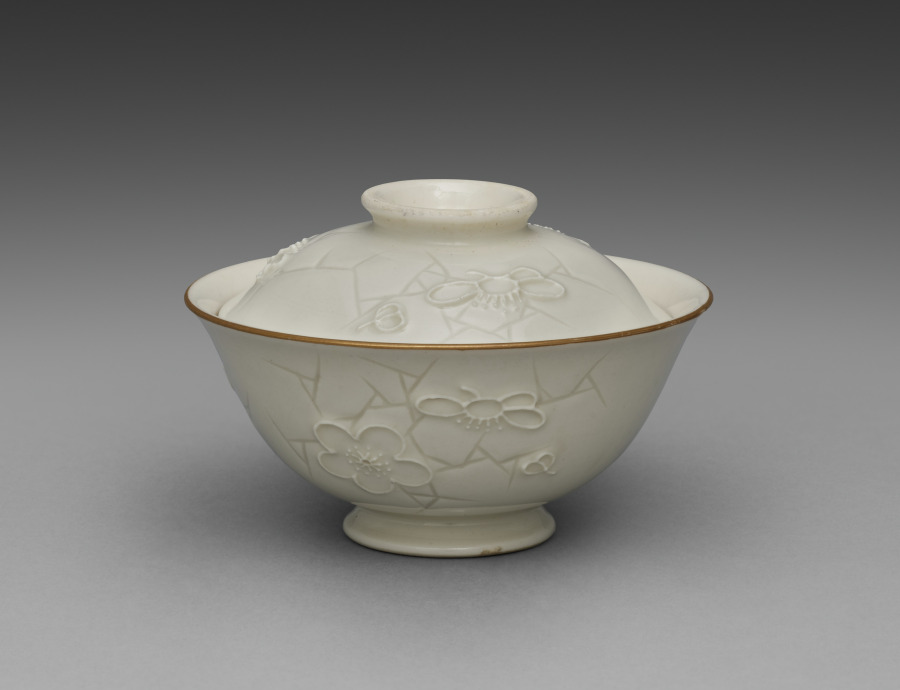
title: Covered Bowl from Dining Set with Plum Blossoms and Cracked-Ice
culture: Japan, Meiji period (1868–1912)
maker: Seifū Yohei II (Japanese, 1844–1878)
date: c. 1875–78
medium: Porcelain with molded designs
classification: Ceramic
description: Each item in this set has a delicate low-relief design of flowering plum branches over scattered, intersecting lines meant to resemble the cracked-ice surface of a frozen body of water and is signed on the base in gold pigment. While Yohei II produced many fine works in underglaze blue, like those produced by Kiyomizu Shichibei, he also made works in quite different styles later in his career, from the early 1870 s. In 1873, he was appointed purveyor to the Industrial Center of Kyoto Prefecture, a designation associated with Kyoto’s efforts to reach an international market through the port of Kobe; and from 1875 until his death, he was involved in national-level projects to present Japanese ceramics across the world. It was during this period that Yohei III was apprenticed to Yohei II, and it has been suggested that this set may in fact be an early example of Yohei III’s work, which he signed with his teacher’s name. Decorated with flowers resembling Japanese textile motifs, the set calls to mind the design of Yohei II’s pair of vases with plum blossoms in the Victoria and Albert Museum. Here, the elaborate trees created for a formal public exhibition setting have been translated into the approachable blossoms of the genteel domestic environment. While the designs are consistent across the pieces, each raised flower petal and pistil and each incised line in the ice was done by hand, so the cups, bowls, and dishes are similar yet unique. The bottoms of two boxes once identified the set’s owner, but the information has been deliberately obscured with black ink. However, inscriptions still visible appear to indicate two occasions, once at the end of July 1886 , and once again in June 1916 , when parts of the set were requested from Hokura in Niigata Prefecture. The location corresponds to a neighborhood in the present-day city of Jōetsu. The surname Tsuji 辻 also appears on a paper tag affixed to one of the box cloths. Future research may possibly reveal more about their provenance. A vase by Yohei III in a private collection combines the formal grandeur of the Yohei II vases in the Victoria and Albert Museum with the gentler design of this dining set, placing flowering plum trees against soft, scalloped-edge clouds resembling those in golden screens.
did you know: The dining wares have a creamy white coloration that the four boxes containing them identify as Korean in style.